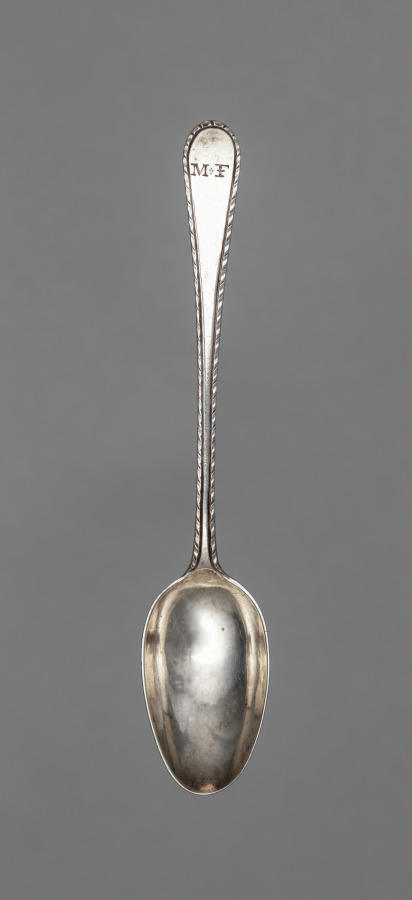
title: Teaspoon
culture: America, New Hampshire, Portsmouth, 18th century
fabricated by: Samuel II Drowne (American, 1749–1815)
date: c. 1770–1780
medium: silver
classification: Silver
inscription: engraved "M+F" in block letters on top of handle end, and "D.F.Wentworth" (later) in script on back of handle end.